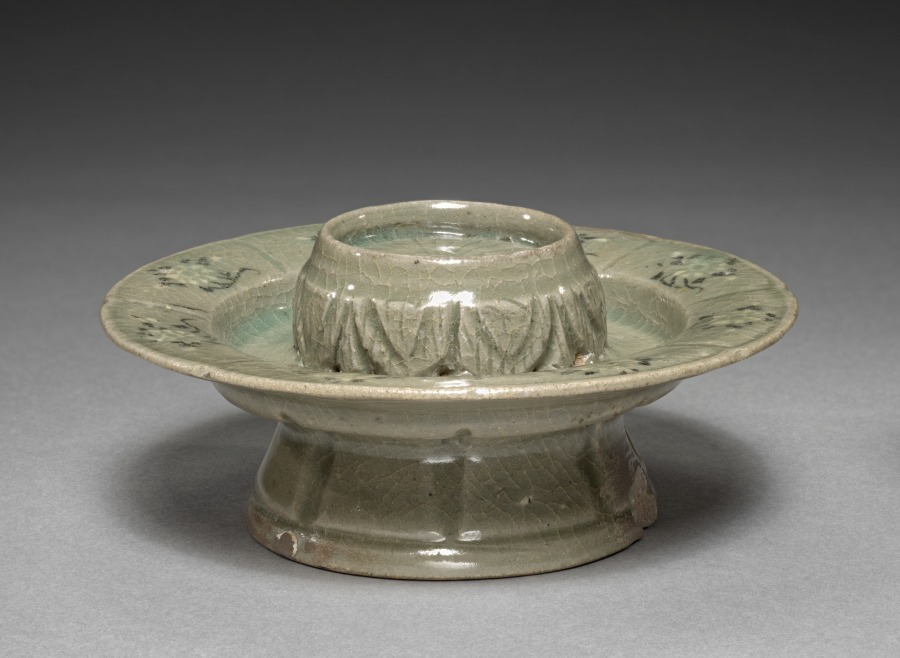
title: Floral-shaped Cup Stand with Inlaid Chrysanthemum Design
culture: Korea, Goryeo dynasty (918–1392)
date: 1100s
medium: inlaid and glazed porcelain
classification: Ceramic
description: As early as the 600s, the practice of drinking tea and wine became an important part of elite culture in Korea. Elites of the Goryeo period commissioned a variety of types of utensils and vessels including this delicate-looking cup stand, not only to make their drinking experience more exciting, but also to show their refined taste.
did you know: During the Goryeo period, a variety of types of tea ware, including this delicate-looking cup stand, were widely used.